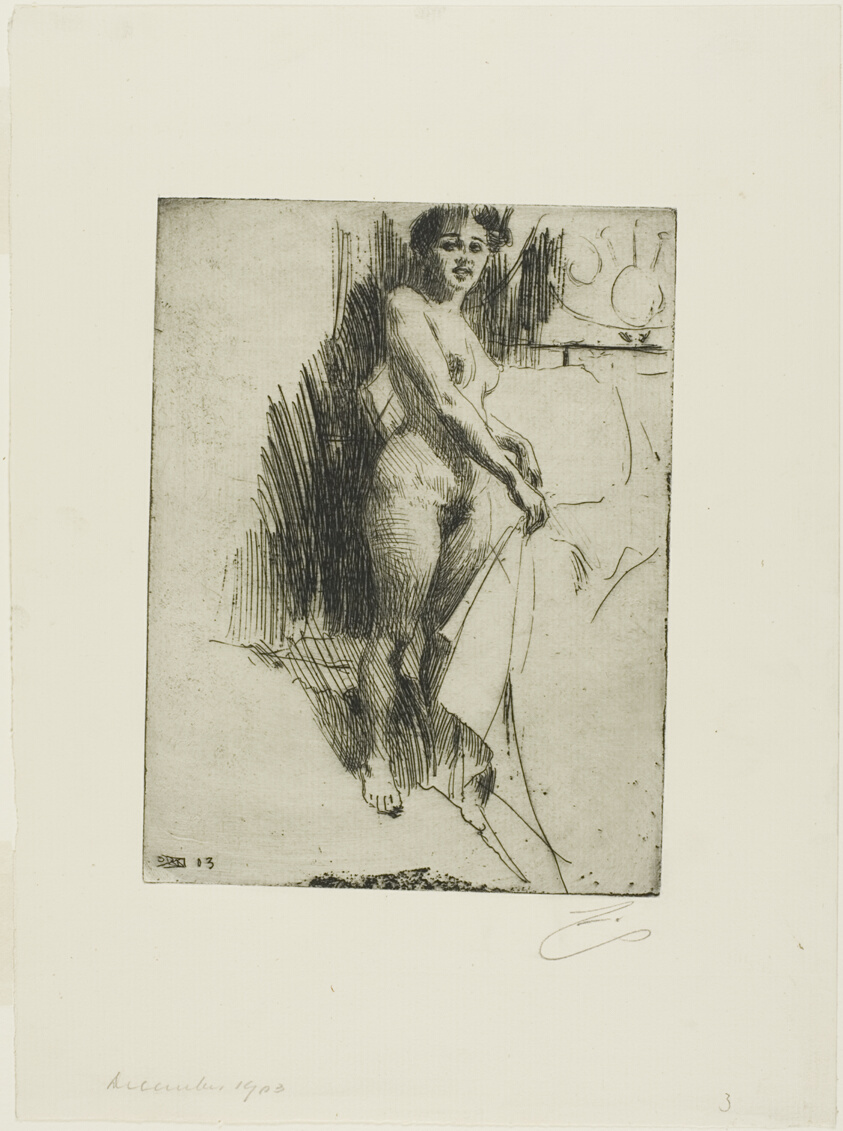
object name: Print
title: Nanette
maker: Anders Zorn (Swedish, 1860-1920)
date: 1903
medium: Etching on ivory laid paper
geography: Sweden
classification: etching; print; prints and drawing